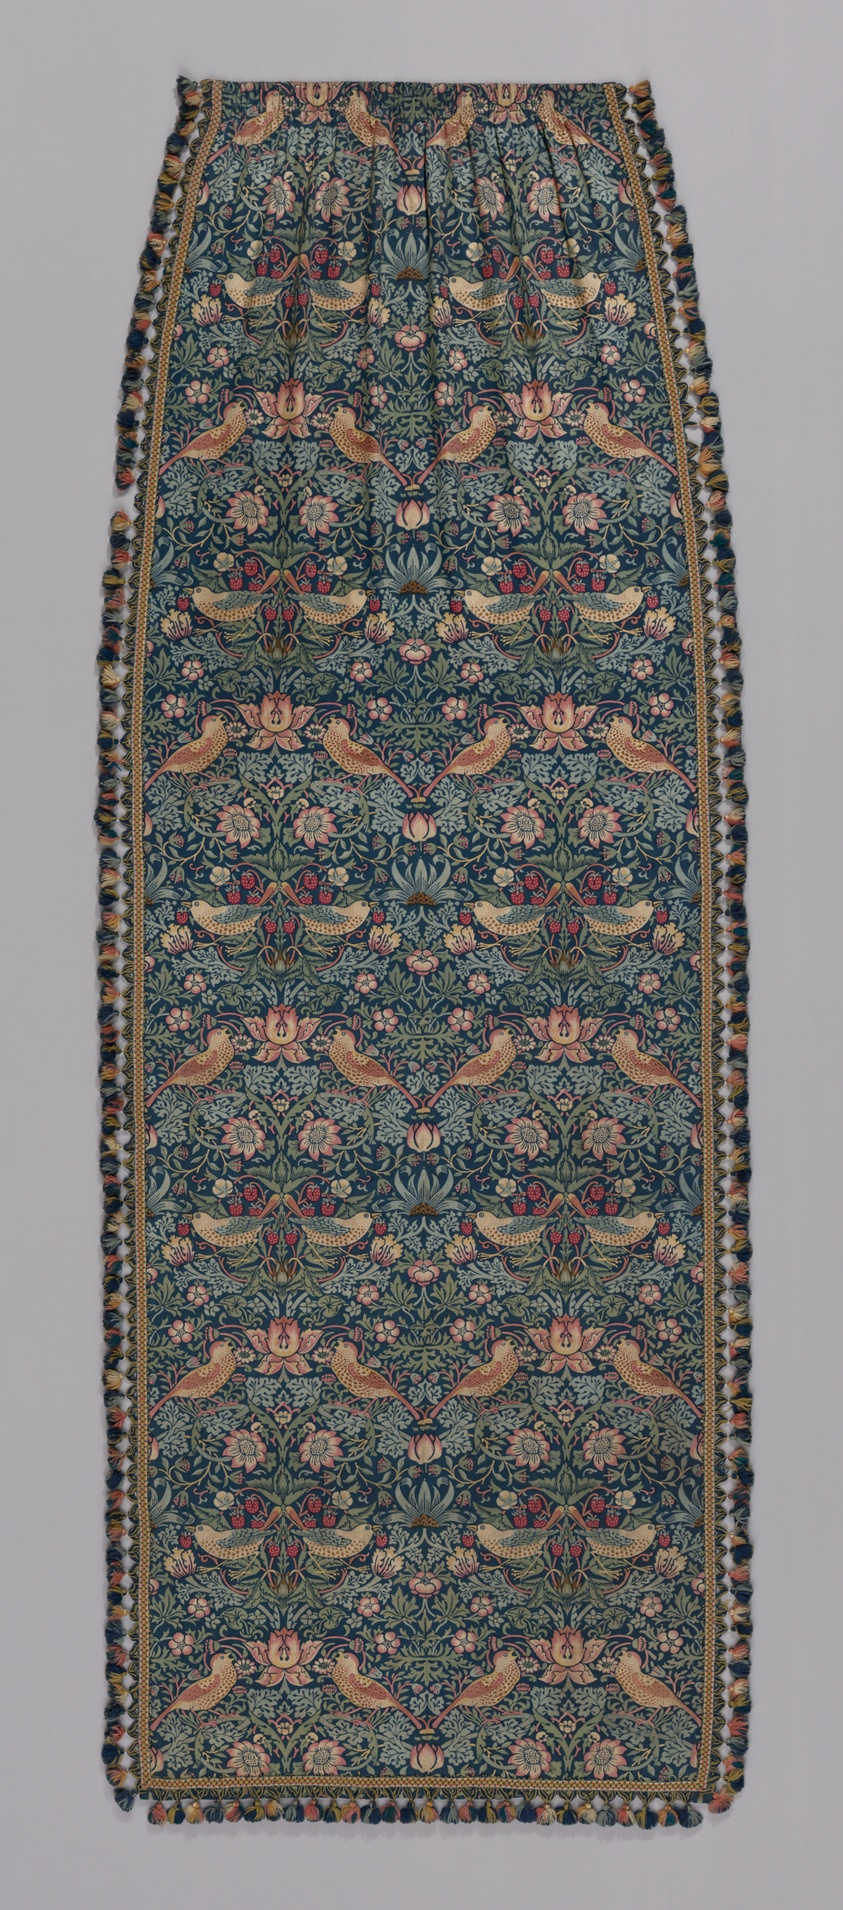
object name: Textile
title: Strawberry Thief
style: Arts and Crafts Movement, 19th century, british, 20th Century, British Arts and Crafts Movement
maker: Designed by William Morris (English, 1834–1896); Produced by Morris & Co., London (English, 1875–1940); Merton Abbey, London (English, 1881–1940)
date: Design 1883, made 1883–1917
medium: Cotton; plain weave, block printed, wool trim with tassels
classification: printed textile; textile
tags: birds, animals, eating, strawberries, fruit, flowers, floral motifs, foliage